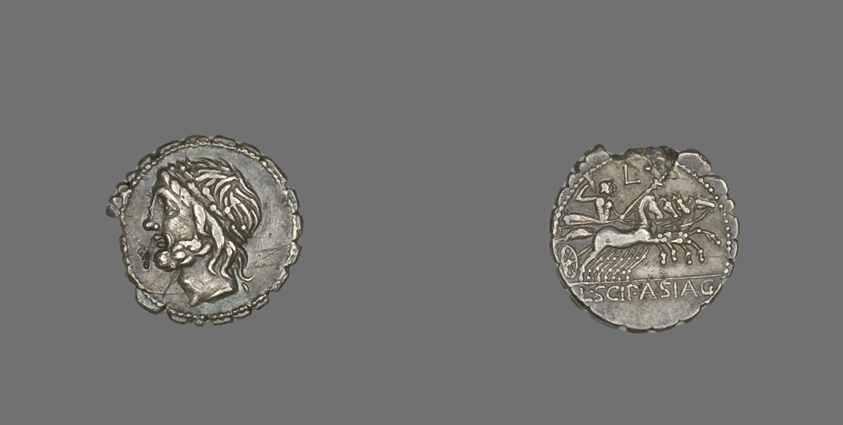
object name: Coin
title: Denarius Serratus (Coin) Depicting the God Saturn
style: republic period, ancient, roman (ancient, style or period)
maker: Roman, minted in Rome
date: 106 BCE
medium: Silver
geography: Italy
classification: coin; ancient art; struck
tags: gods (deities), Chariots